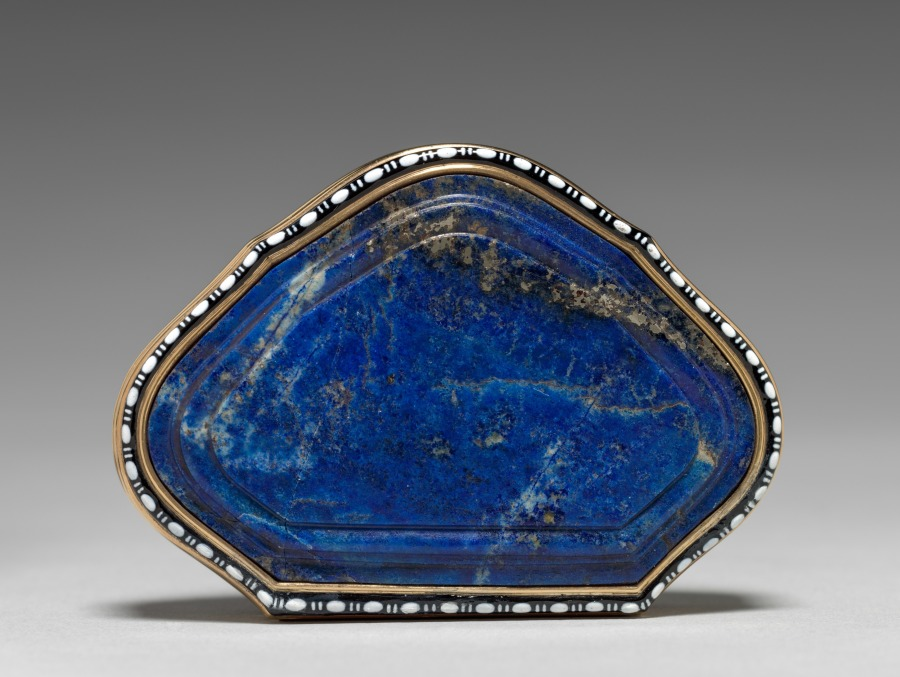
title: Snuff Box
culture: Germany, Dresden (?), mid-18th century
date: mid-1700s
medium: lapis lazuli with enameled gold mounts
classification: Miscellaneous